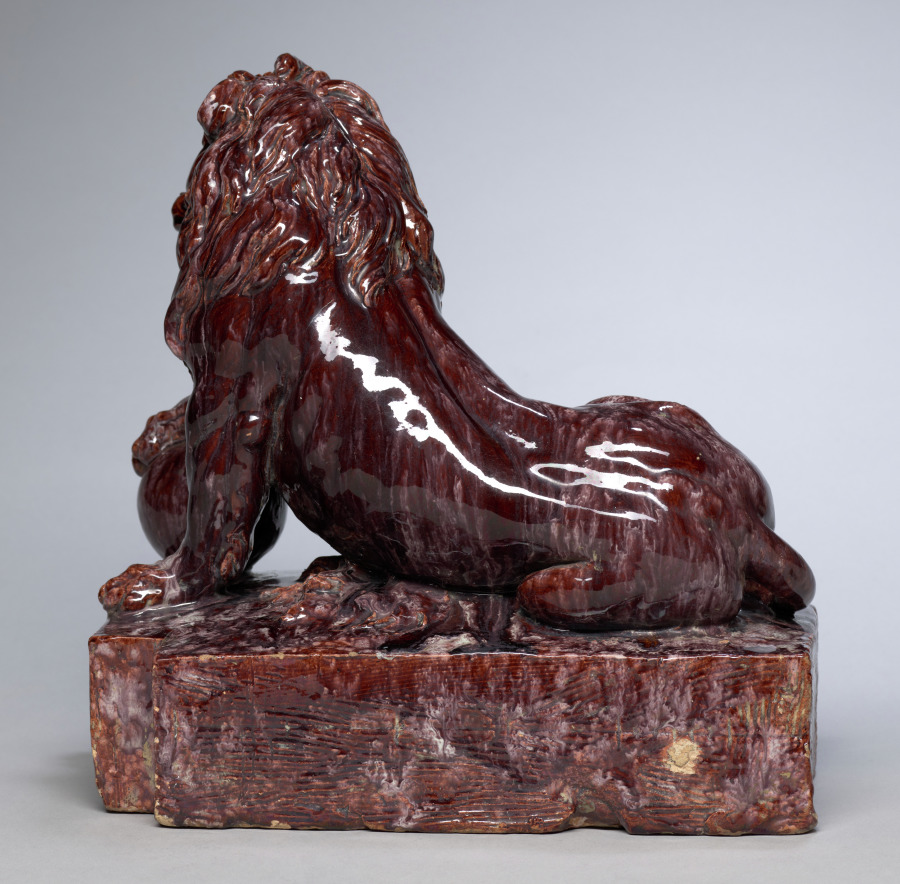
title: Lion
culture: France, 20th century (?)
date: 1900s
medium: terracotta glazed in mottled purple tin glaze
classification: Ceramic